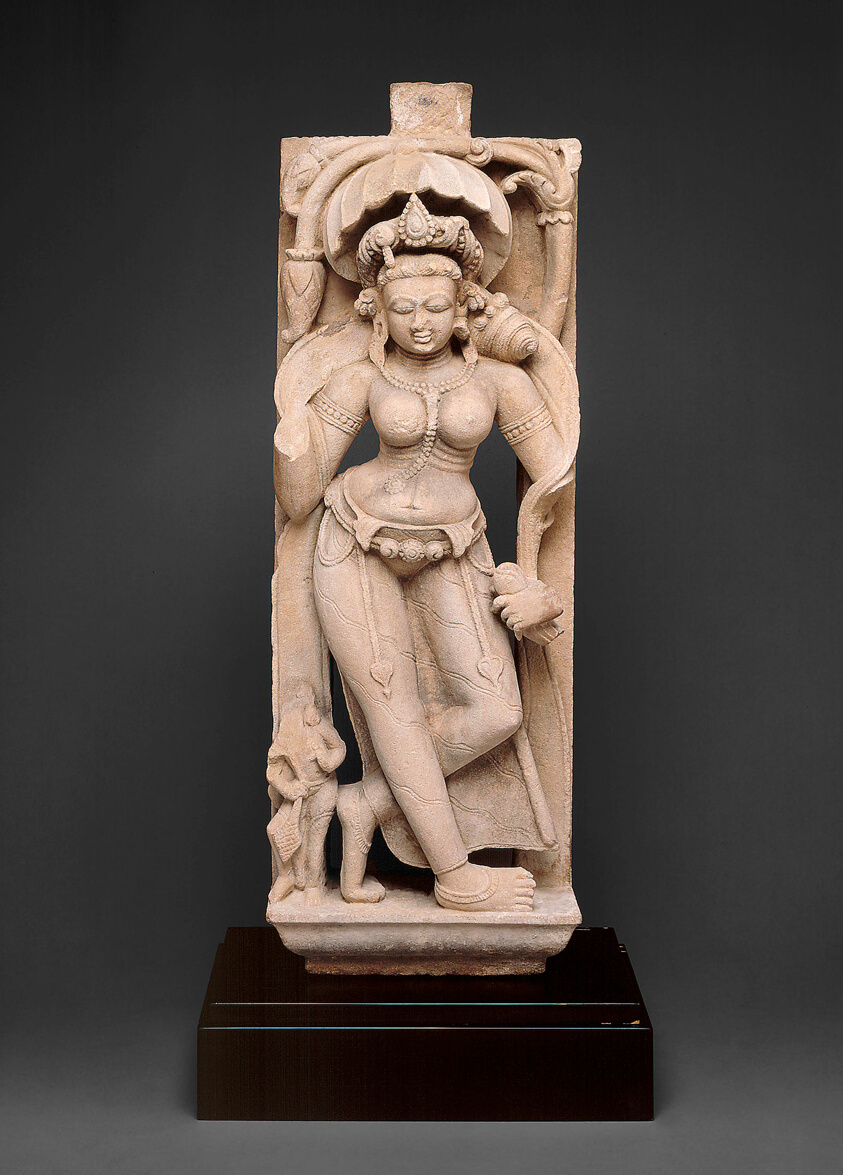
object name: Sculpture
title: Celestial Beauty (Apsara)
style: South Asian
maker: India; Rajasthan, possibly Osian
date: 8th century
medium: Buff sandstone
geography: Rajasthan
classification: sandstone; stone; sculpture; asian art